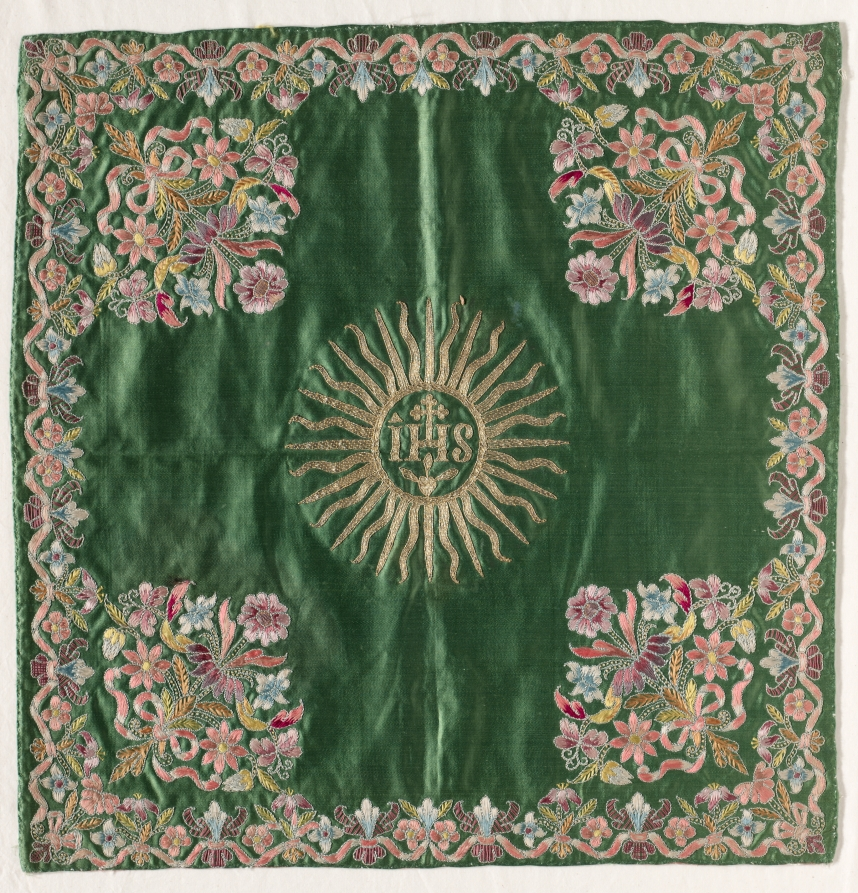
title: Chalice Veil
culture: Italy, 18th century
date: 1700s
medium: embroidered satin and silk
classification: Embroidery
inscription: in center: "I H S."